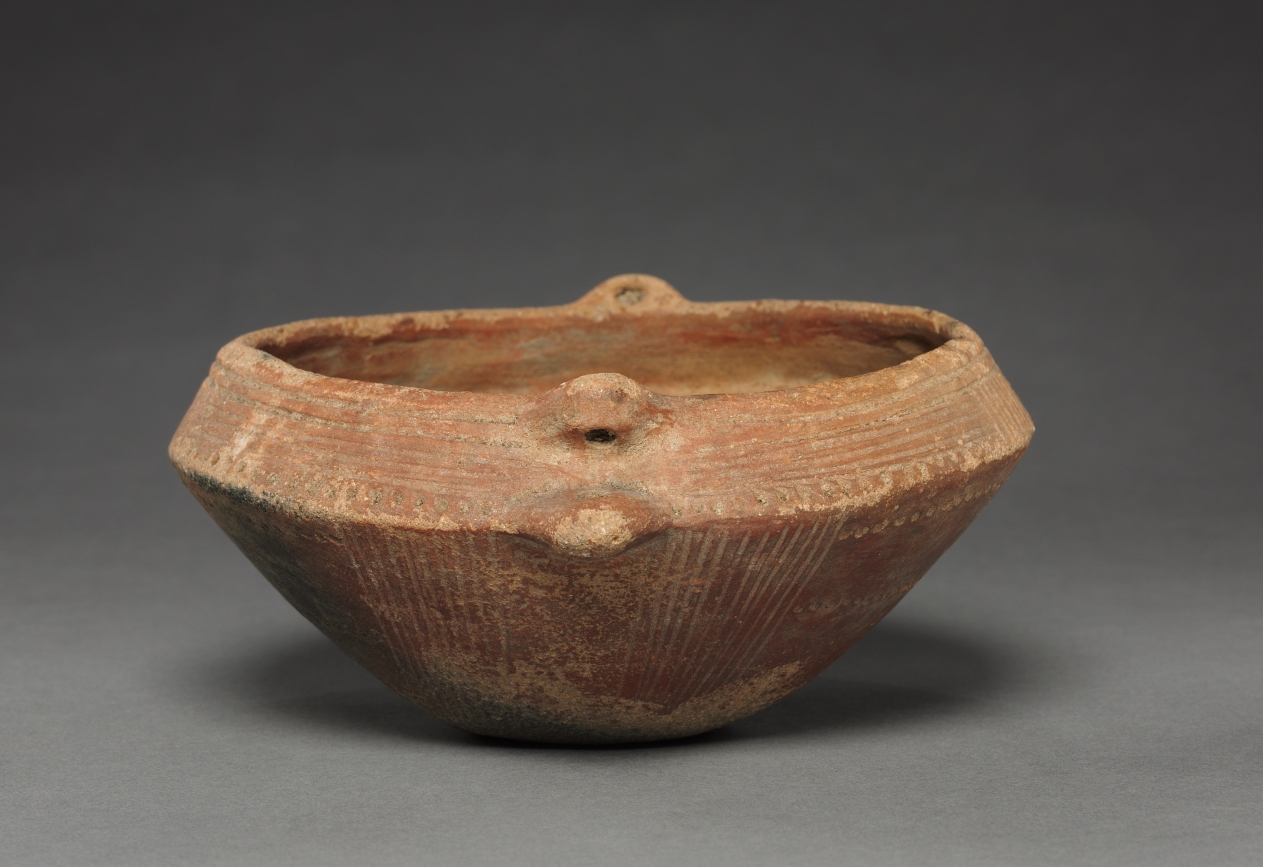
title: Jar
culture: Colombia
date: before 1550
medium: red ware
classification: Ceramic